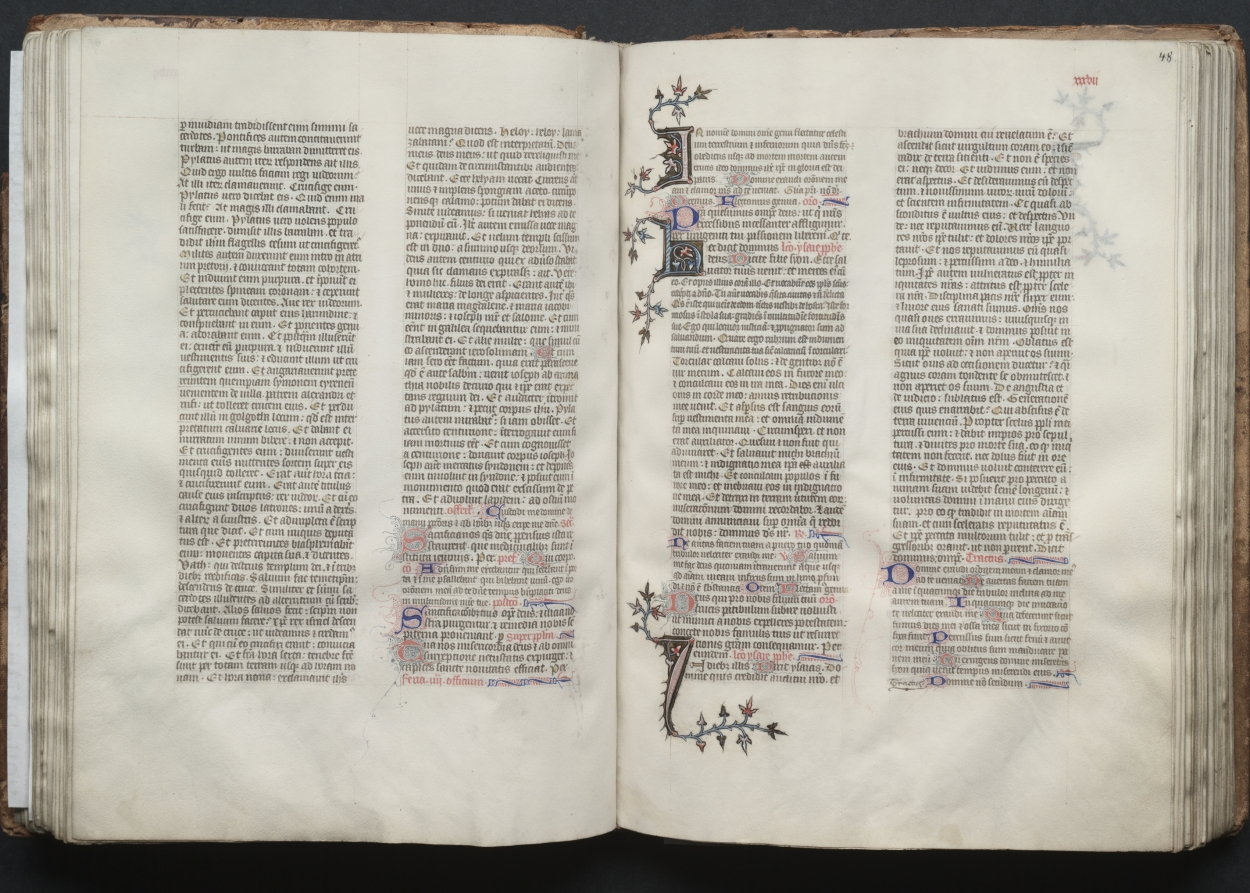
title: The Gotha Missal: Fol. 47v, Text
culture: France, Paris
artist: Master of the Boqueteaux (French)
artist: and Workshop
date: c. 1375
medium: ink, tempera, and gold on vellum; blind-tooled leather binding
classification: Bound Volume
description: The style and quality of this manuscript's decoration is typical of deluxe Parisian books made for aristocratic or royal patrons. Most of the book's decoration appears to be the work of the Master of the Boqueteaux, an artist active at the court of King Charles V (died 1380). His style was apparently shared by a number of book illuminators working in and around Paris. It is very possible that the Gotha Missal belonged to Charles V, but is not provable because the manuscript has no royal portraits and lacks a colophon. Given the book's magnificent decoration, however, it would seem that it was produced for a Valois prince, if not for the king himself. The manuscript receives its name from the German dukes of Gotha, its later owners.